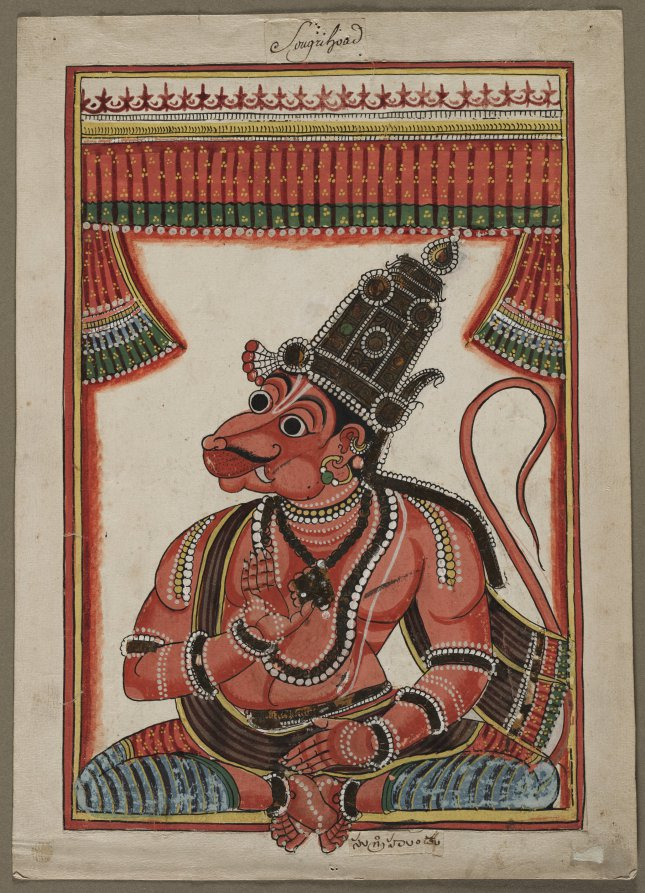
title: Sugriva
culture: Southern India, Andhra Pradhesh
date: c. 1720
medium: Gum tempera, ink, and hand-colored silver paper appliqué on paper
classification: Painting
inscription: [[upper center, in French]] Sougrihoad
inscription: [[lower center, in Telegu]] sugrihuṃḍu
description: The seated monkey king Sugriva presents the “fear not” gesture with his right hand. He served as Rama’s faithful ally during the war against Ravana. This work appears to have been made for French Jesuit missionaries by South Indian temple muralists. During the 1700s, missionaries commissioned sets of paintings from which they learned about the gods and literary figures popular among the people of the region.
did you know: Instead of gold, artists applied strips of paper, colored with a mixture of silver paint and an organic yellow pigment called gamboge.